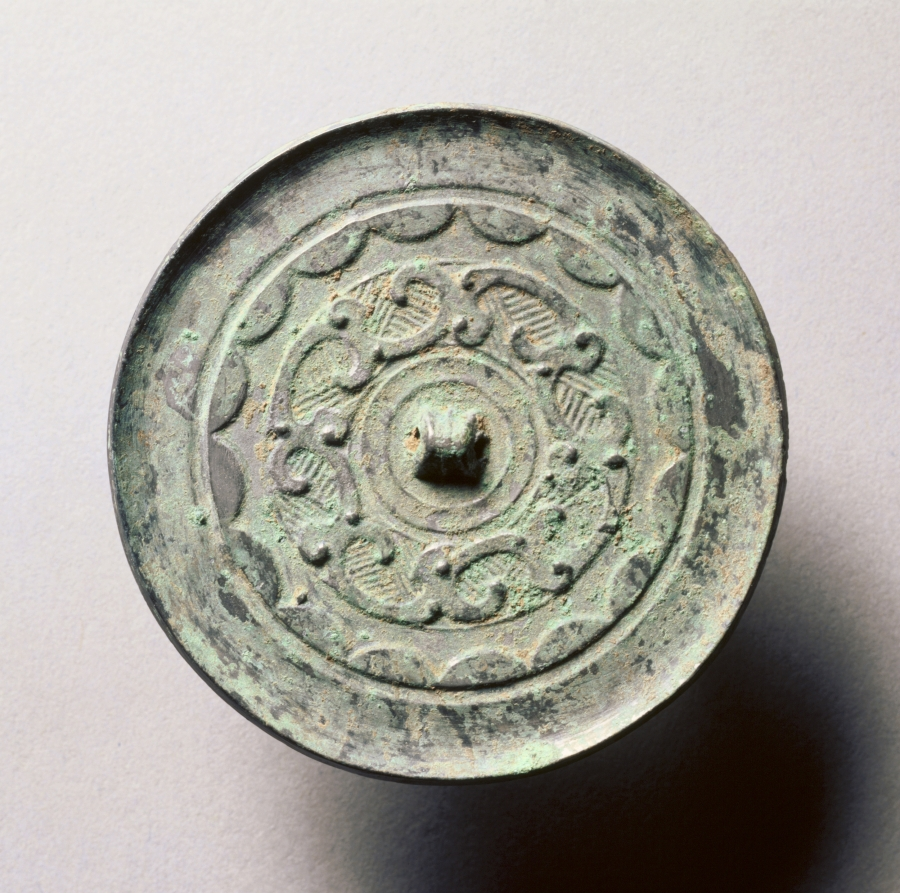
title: Mirror with Continuous Arcs and Quasi-Dragons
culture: China, Western Han dynasty (206 BCE–8 CE)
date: late 300s BCE–50 CE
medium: bronze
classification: Metalwork